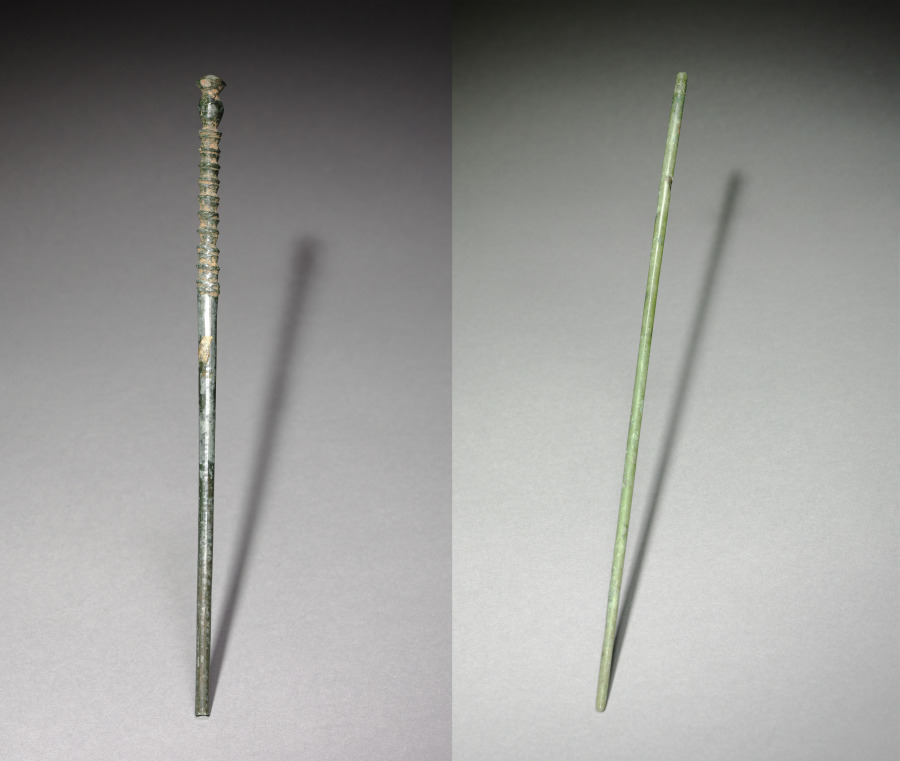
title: A Pair of Chopsticks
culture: Korea, Goryeo dynasty (918–1392)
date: 918–1392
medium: bronze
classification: Metalwork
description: In Korea, chopsticks made of metal such as brass, silver, and gold were excavated from ancient tombs and ruins dated to the 6th century at the earliest. Burial goods often include utilitarian objects such as table wares and utensils because the dead were believed to need them in the afterlife.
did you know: In contrast to the Chinese and Japanese, Koreans still prefer metal chopsticks (stainless steel and brass) to wooden ones.